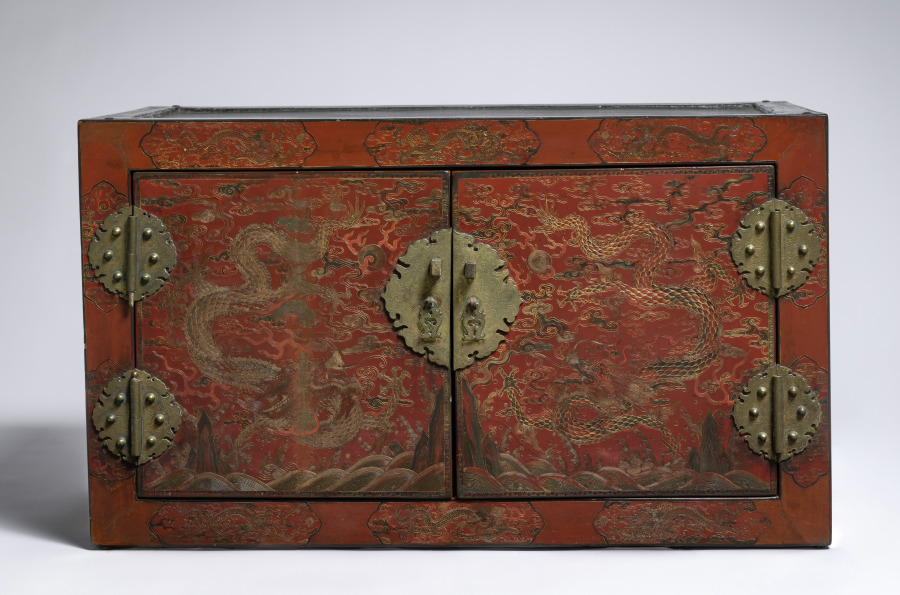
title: Top Chest of a Double Cabinet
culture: China, Ming dynasty (1368-1644) - Qing dynasty (1644-1911)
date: 1600s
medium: red lacquer on wood with pigment and gilding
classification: Furniture and woodwork